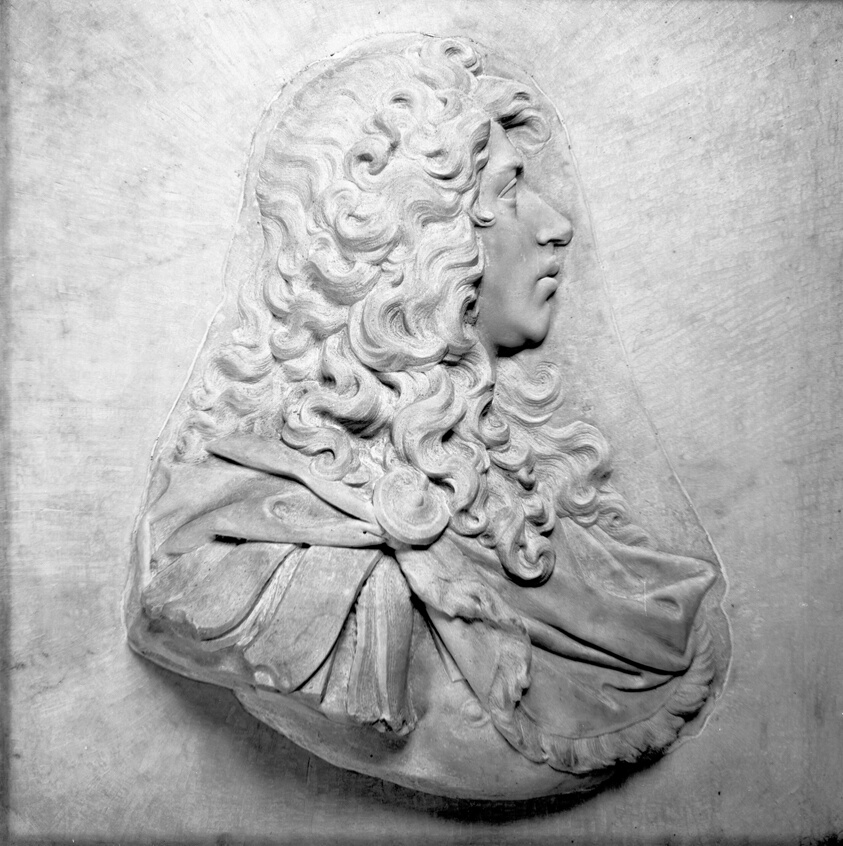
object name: Sculpture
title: Profile Bust of the Prince of Condé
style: 17th Century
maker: Follower of Antoine Coysevox (French, 1640-1720)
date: c. 1685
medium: Marble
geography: France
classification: relief; portrait; french; sculpture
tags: portraits: male subject, portrait, portraits, man, royal, royalty, busts, nobility, head